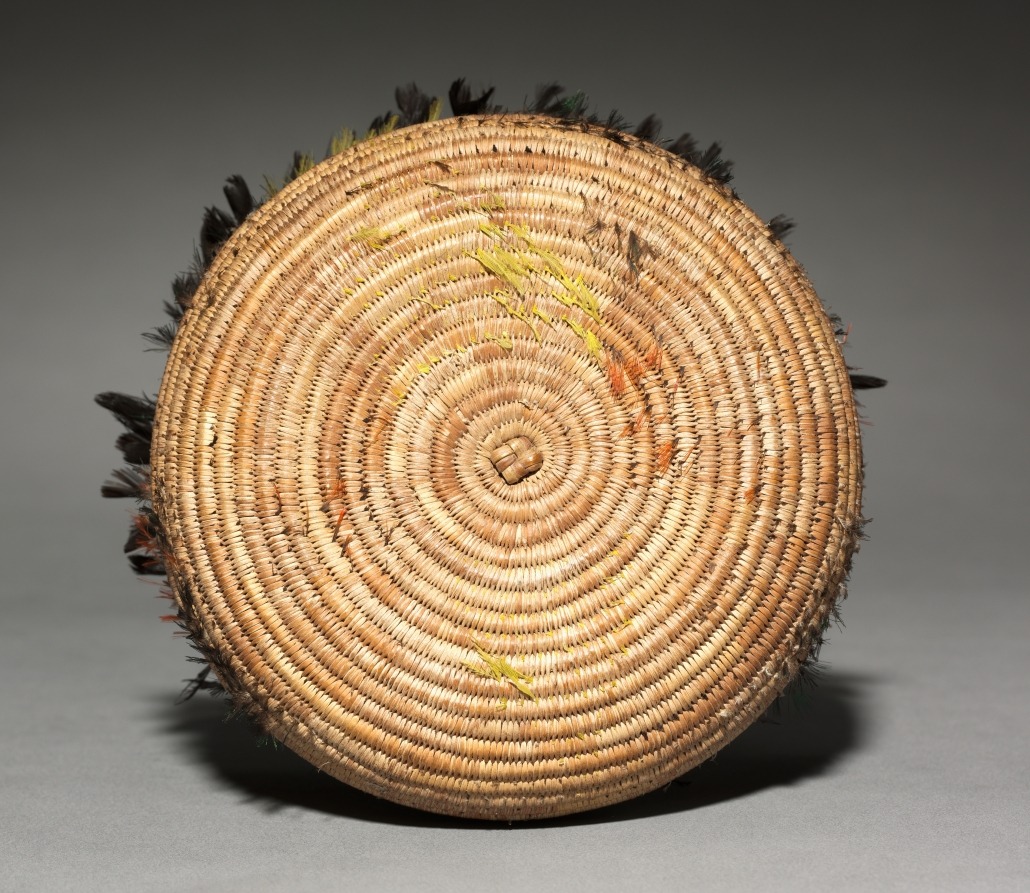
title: Gift Bowl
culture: California, Pomo, Eastern, Late 19th- Early 20th century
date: 1900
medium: Sedgw with Feathers; Coiled (3 rods)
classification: Basketry